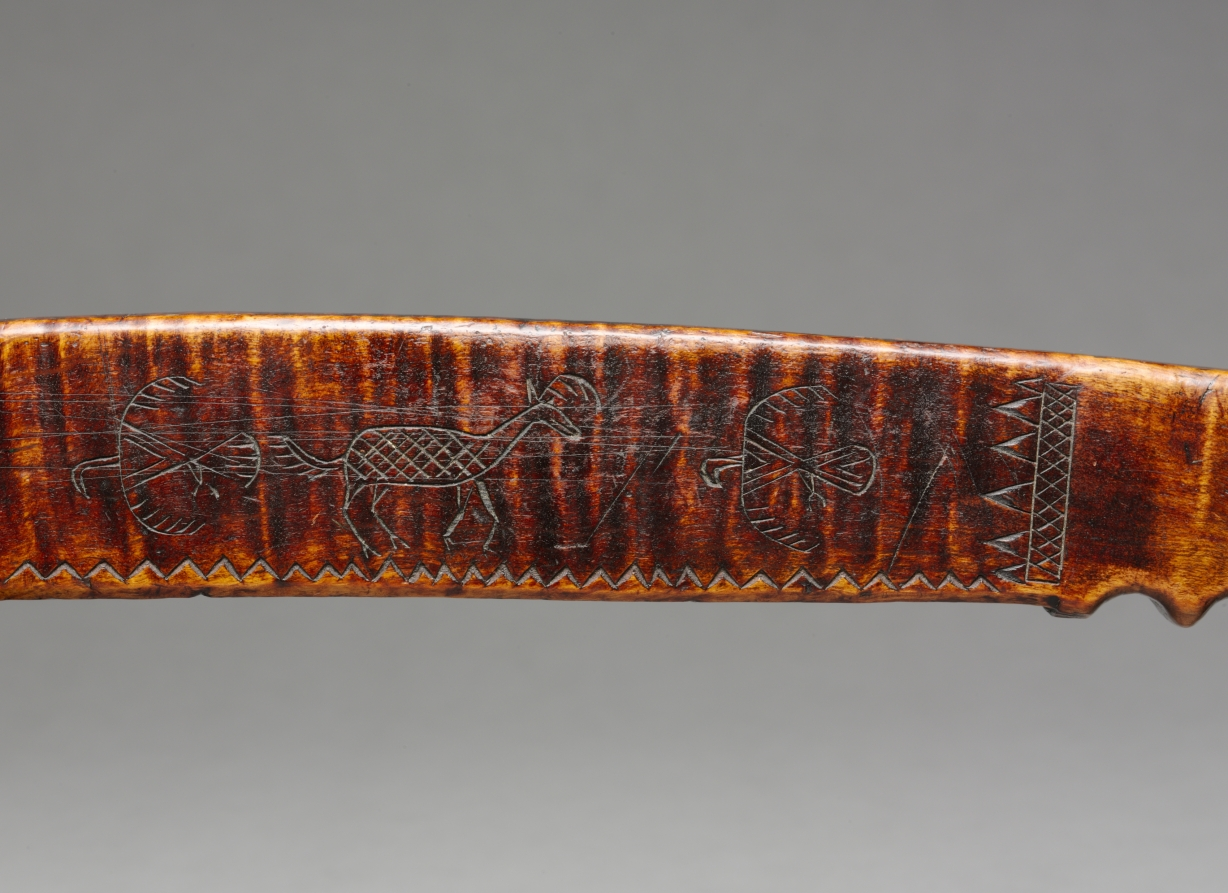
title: Ball-Headed War Club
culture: Native North America, Northeastern Woodlands, Great Lakes, Anishinaabe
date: late 1700s–early 1800s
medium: wood (maple?)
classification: Implements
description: The ball at the striking end of this club is clenched in an abstract, jawlike form that likely refers to a protector animal who endowed the owner with power. Incised on the shaft is a rich record of doodemag (singular, doodem, “totem”)—animals representing other-than-human progenitors from which Anishinaabe peoples trace their descent. (The Anishinaabeg, a group of related Great Lakes nations, include the Odawa, Ojibwe, Potawatomi, and others.) Included is an antlered creature, perhaps a caribou, along with mammals, birds, and powerful spirit beings: the thunderbird, its wings outstretched, and perhaps the long-tailed underwater panther. When this example was made, clubs had become symbols of status and earlier ways of life, having been replaced as favored weapons by metal tomahawks and European firearms. Today, clubs are part of powwow regalia.